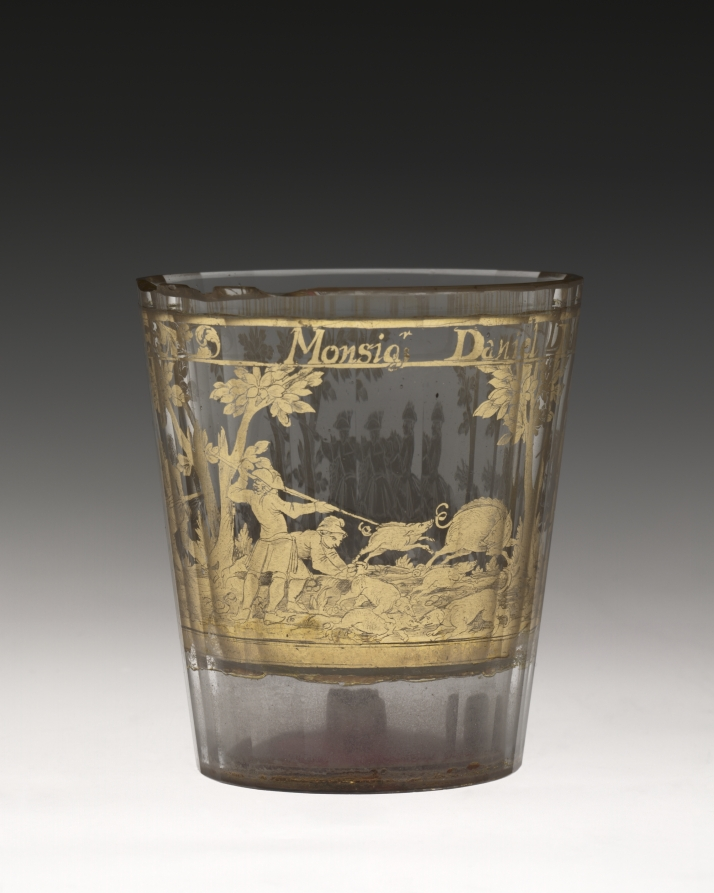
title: Tumbler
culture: Bohemia, 18th century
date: c. 1730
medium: zwischengoldglas (glass)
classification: Glass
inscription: in gold, around rim of glass: Monsigr. Daniel Delfino Patriarcha di Aguilleid